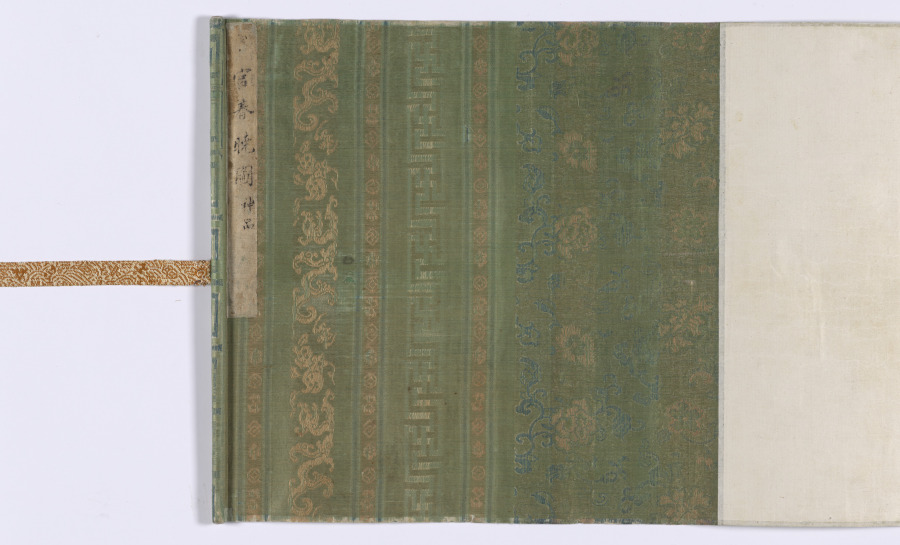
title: In the Palace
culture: China, Southern Song dynasty (1127-1279)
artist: after a work attributed to Zhou Wenju (Chinese, active 942–961)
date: before 1140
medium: Handscroll; ink and light color on silk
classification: Painting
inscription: 1 colophon and 13 seals: 1 colophon and 1 seal of Zheng Cheng 張澂 (d. 1143); 12 seals unidentified.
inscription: Colophon by Zhang Cheng 張澂 (d. 1143): 周文矩宮中圖婦人小兒其數八十，一男子寫神，而粧具、樂器、盆盂、扇椅席、鸚鵡、犬蝶不與。文矩句容人，為江南翰林待詔。作士女體近周昉，而加纖麗。嘗為後主畫南莊圖，號一時絕筆。它日上之朝廷，詔籍之祕閣。宮中圖云是真蹟，藏前太府卿朱載家。或摹以見餽。婦人高髻自唐以來如此。此卷豐肌長襦裙，周昉法也。予至嶠南，於端溪陳高祖之裔，見其世藏諸帝像，左右宮人梳髻與此畧同。而丫鬟乃作兩大鬟，垂 肩項間，雖醜而有真態。李氏自謂南唐，故衣冠多用唐制，然風流寔承六朝之餘。畫家者言辨古畫當先問衣冠車服，蓋謂是也。紹興庚申五月乙酉澹嵒居士題。 印：張澂印章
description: In the Palace depicts 13 ladies of the imperial household, three servants, and six children in fluent baimiao (plain drawing) brushwork, accentuated by color. The women entertain themselves by making music, tending children, and playing with pets. Their elaborate hairstyles, plump figures, and flowing robes are reminiscent of Tang dynasty fashion. The scroll illustrates elegant court life and is a direct copy of the original by Zhou Wenju (active 940–75) from Zhenjiang, Jiangsu province. Zhou was employed at the Southern Tang court in Nanjing under Emperor Li Yu (reigned 961–76), a prolific poet.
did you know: The ladies' elaborate hairstyles, plump figures, and flowing robes are reminiscent of Tang dynasty fashion.